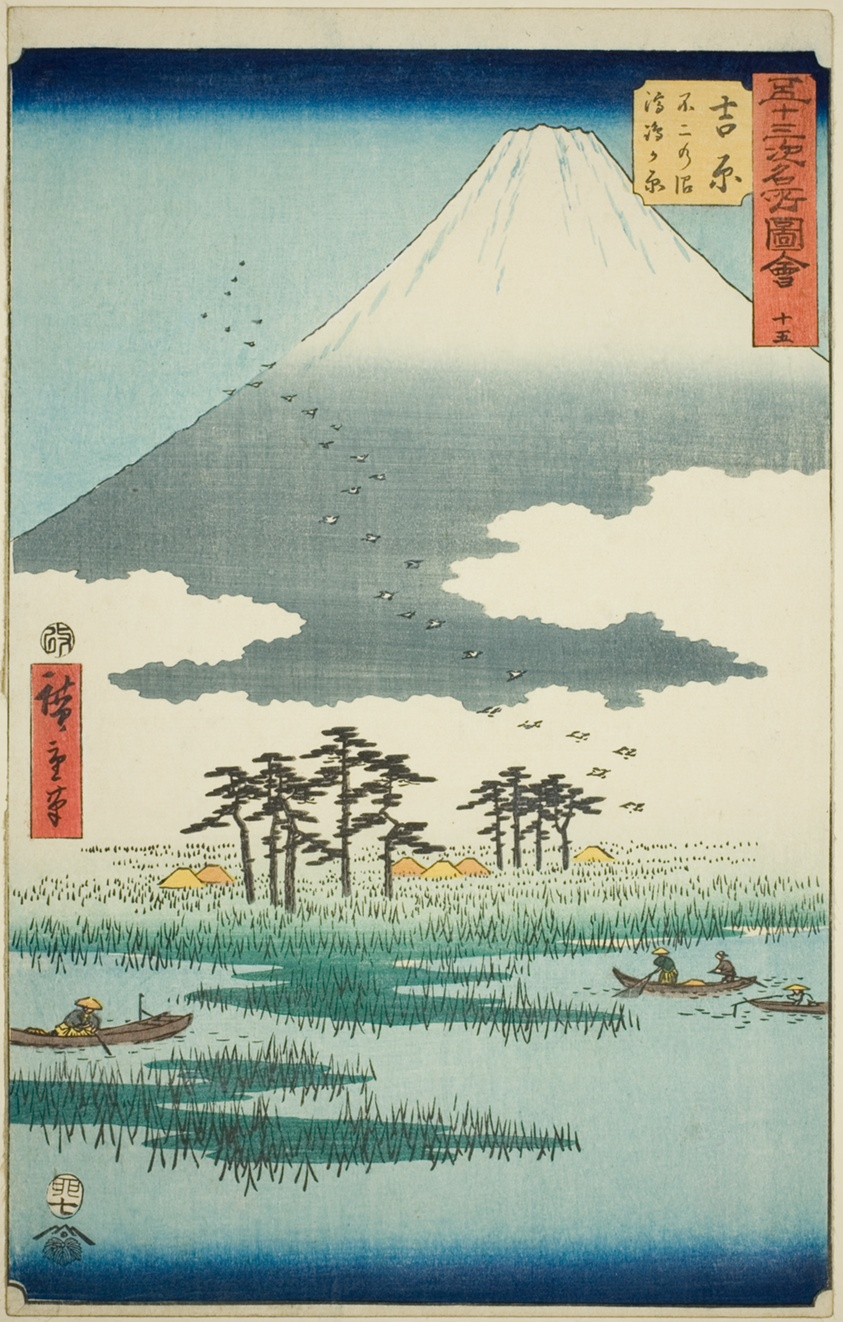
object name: Print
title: Yoshiwara: Fuji Marsh and Ukishima Plain (Yoshiwara, Fuji no numa ukishima ga hara), no. 15 from the series "Famous Sights of the Fifty-three Stations (Gojusan tsugi meisho zue)," also known as the Vertical Tokaido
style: Japanese (culture or style)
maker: Utagawa Hiroshige 歌川 広重; Japanese, 1797-1858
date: 1855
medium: Color woodblock print; oban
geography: Japan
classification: woodblock print; print; asian art